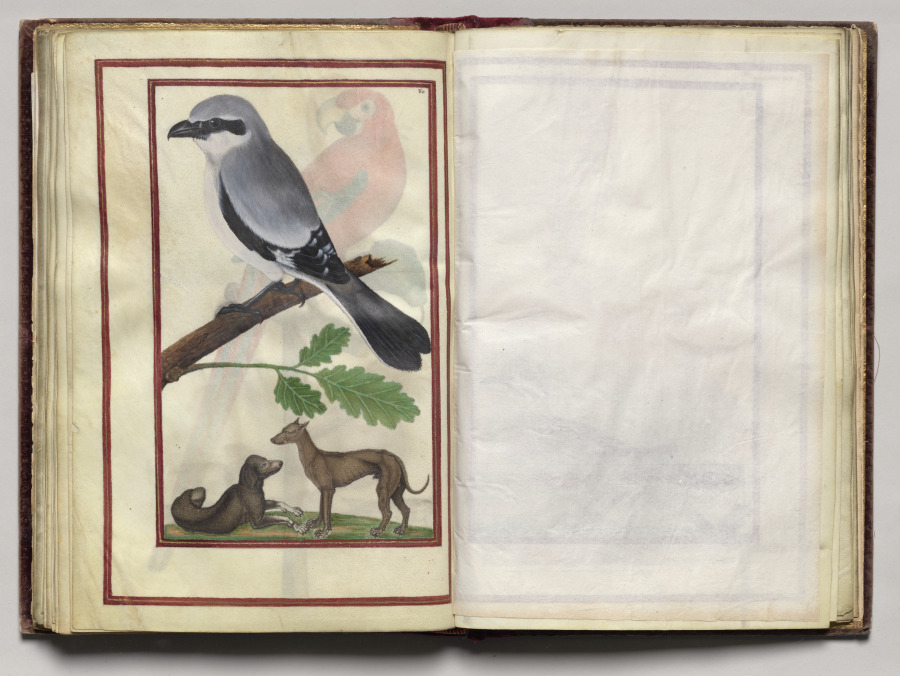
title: Gray Bird with Two Dogs, folio 38 (verso), from Florilegium (A Book of Flower Studies)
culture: France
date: 1608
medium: watercolor, ink, silver, and gold over occasional traces of pencil, on vellum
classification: Bound Volume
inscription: Dated: Poitiers 1608 (on frontispiece) Signed: On frontispiece in black ink, lower right: Van Kuyk Notation on drawing: Frontispiece: in pencil, lower margin: * élève de Van Kessel, peintre flammand (* in pencil also appears in front of Van Kuyk's name).